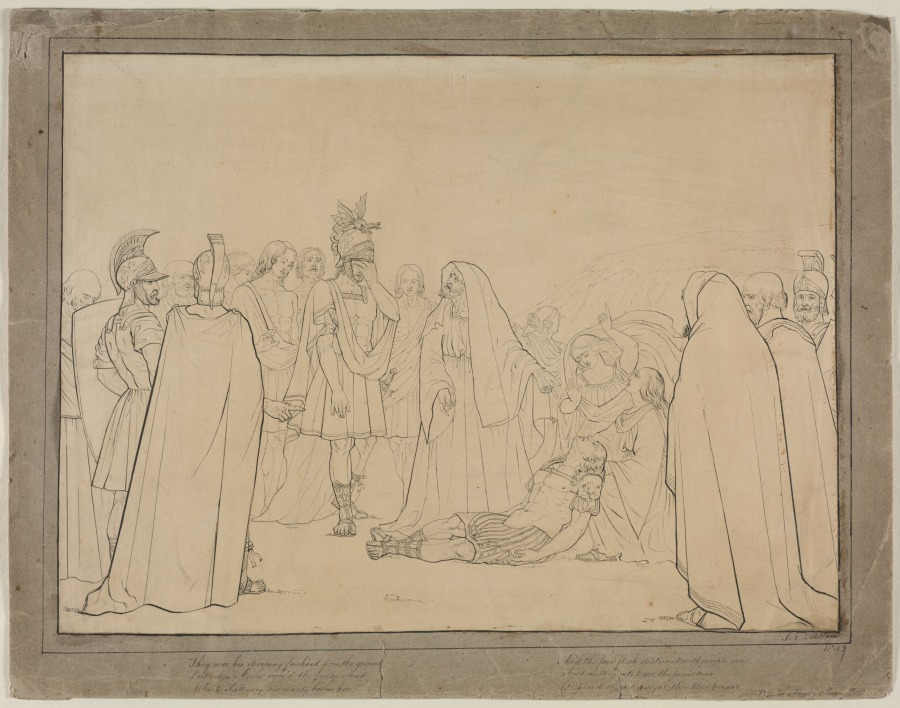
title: Aeneas Shown the Body of Pallas from Virgil's "Aeneid"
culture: England, 19th century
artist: John Everett Millais (British, 1829–1896)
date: 1843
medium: pen and black ink on original mount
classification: Drawing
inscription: inscribed, original mount, lower right, in black ink: J. E. Millais / 1843 inscribed, original mount, lower margin, in black ink: They rear his drooping forehead from the ground;/ But when Aeneas view’d the grisly wound / Which Pallas in his manly bosom bore, / And the fair flesh distain’d with purple gore:/ First, melting into tears, the pious man/ Deplor’d so sad a sight, then thus began inscribed, original mount, lower right, in black ink: Dryden’s Virgil [?] Book (worn away) note: Inscription from John Dryden’s (1631-1700) translation of Virgil’s Aeneid Book XI (1697).